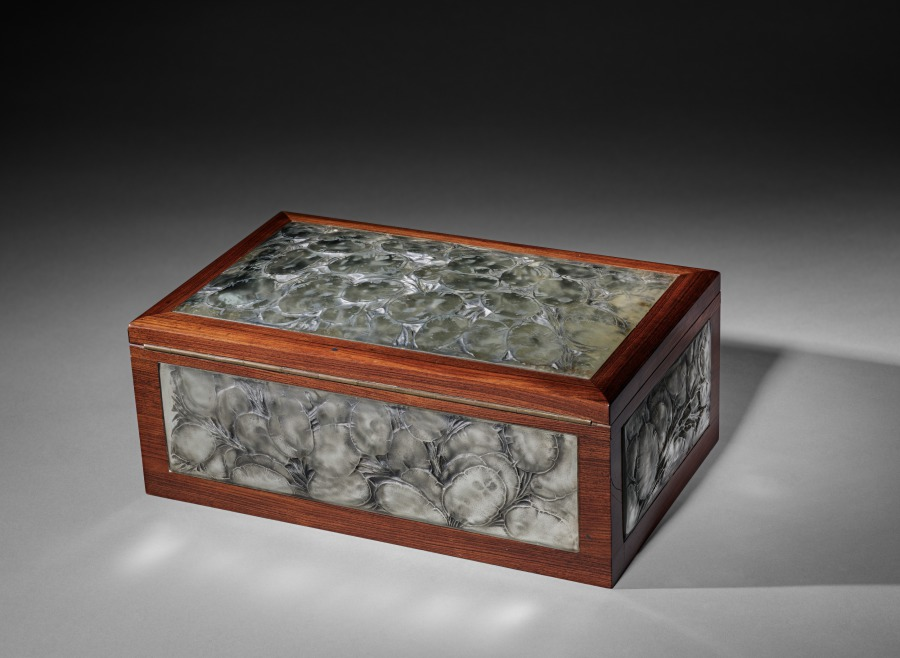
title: Monnaie du Pape Coffer (coffret)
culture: France, 20th century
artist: René Lalique (French, 1860–1945)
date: c. 1914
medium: wood, bombé glass panels with gray patina, metal key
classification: Mixed Media